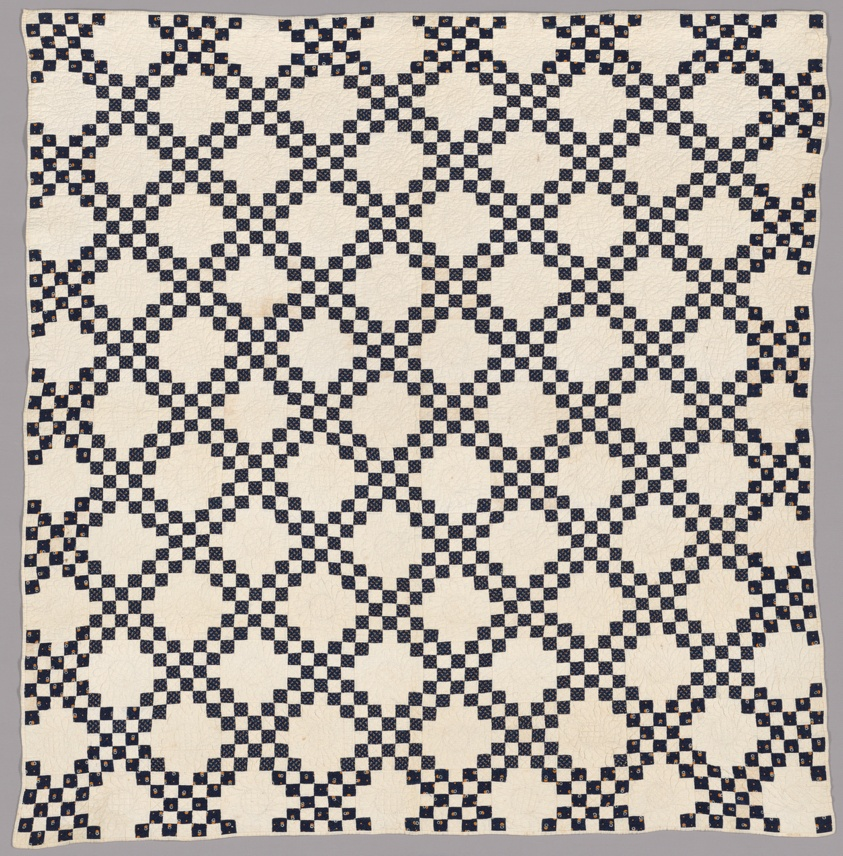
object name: Coverings and Hangings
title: Bedcover (Double Irish Chain)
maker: United States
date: c. 1850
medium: Cotton, plain weave; pieced with cotton, plain weave, printed; quilted; backed with cotton, plain weave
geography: United States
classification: textile; needlework - quilt